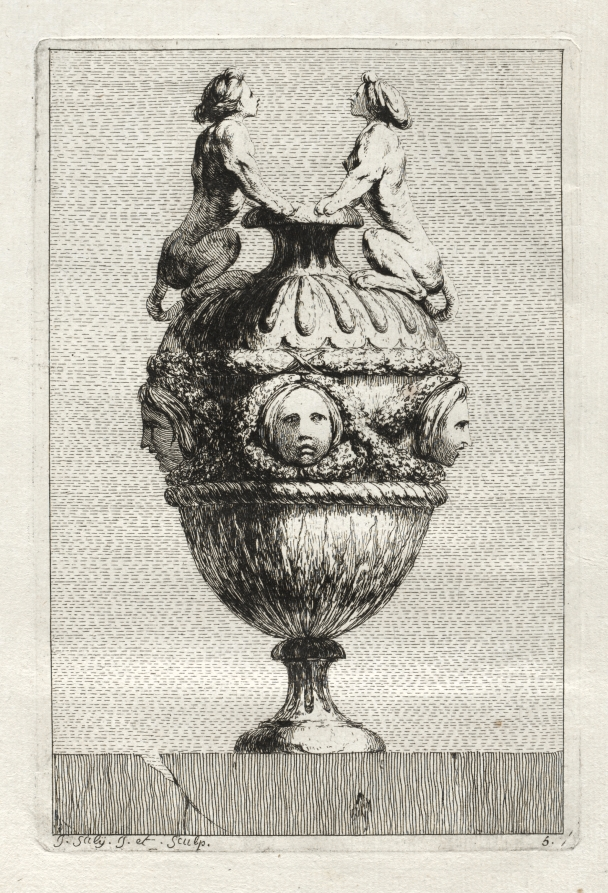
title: Suite of Vases: Plate 5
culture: France, 18th century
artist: Jacques François Saly (French, 1717–1776)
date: 1746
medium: etching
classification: Print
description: Designing ornamental vases or urns was particularly popular during the mid-18th century since the only limit to the possibilities was the imagination of the artist. Saly, a sculptor by training, was a student at the French Academy in Rome from 1740 to 1746, at which time he published a set of 30 etchings. Saly began with basic antique vase forms but deviated from classical ornament to use a rich variety of fantastic creatures for embellishment.